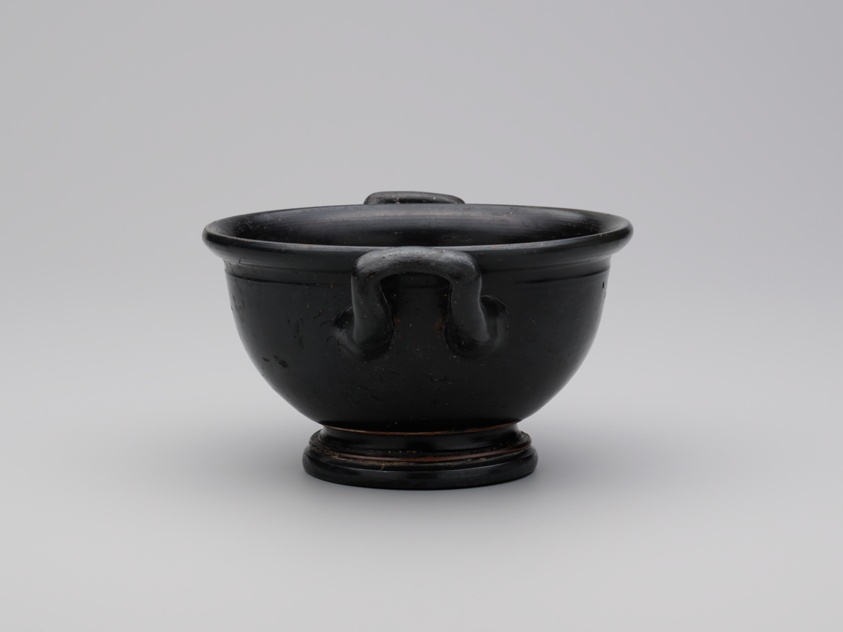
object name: Vessel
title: Skyphos (Drinking Cup)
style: greek, ancient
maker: Greek; Athens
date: 410-400 BCE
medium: terracotta, black-glaze with impressed decoration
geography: Cales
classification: drinking vessel; ceramics; vessel; ancient art